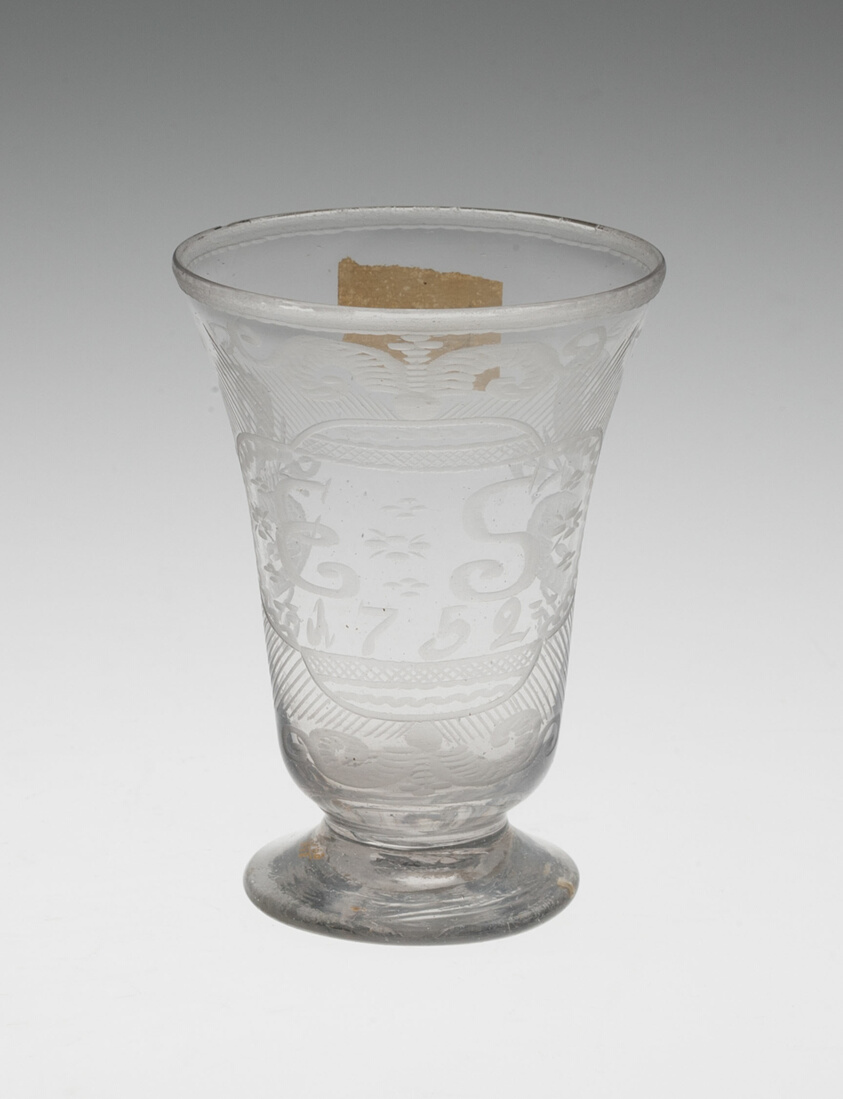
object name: Glass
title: "Hogarth" Cordial Glass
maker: England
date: 1752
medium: Glass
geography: England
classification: drinking vessel; glass; european decorative arts